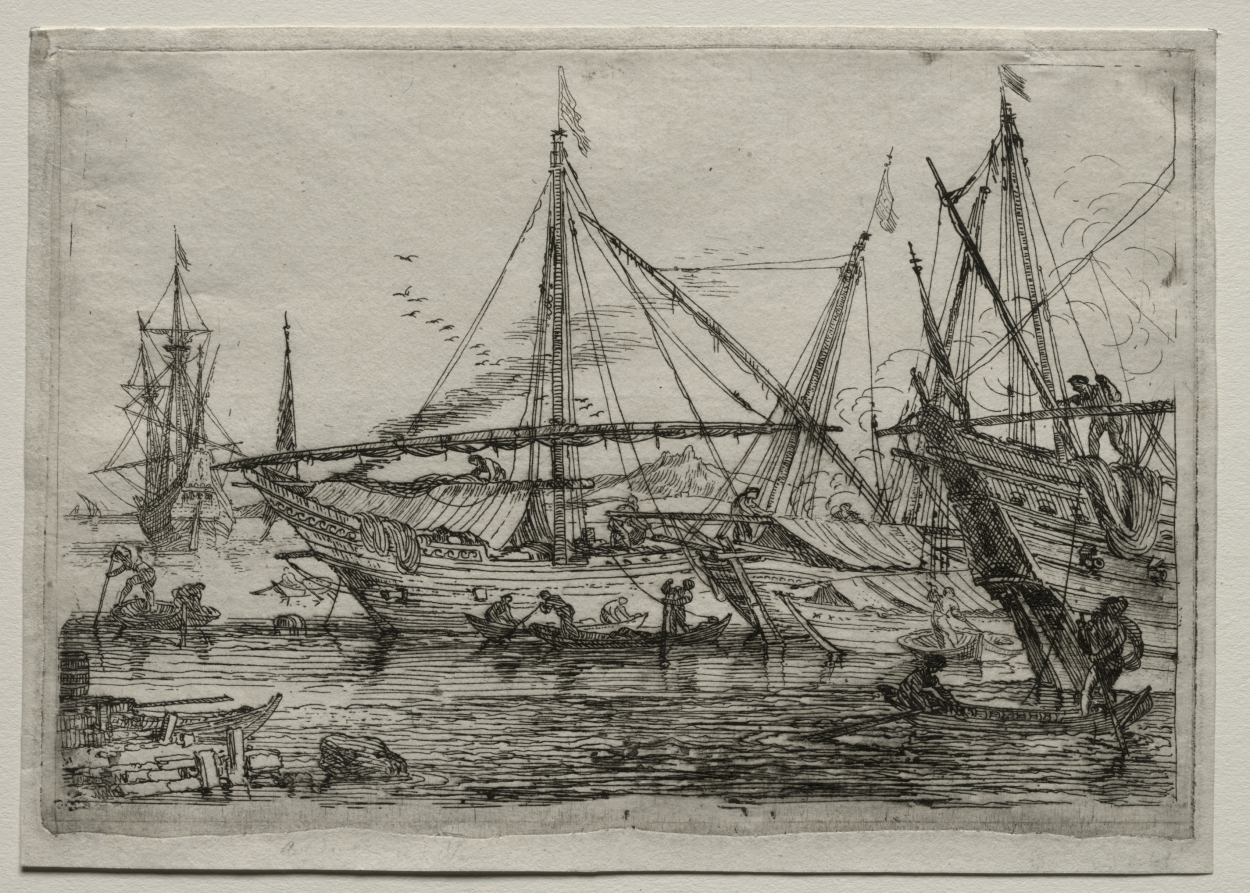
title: A Mediterranean Harbor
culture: Netherlands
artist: Adrian van der Cabel (Dutch, 1631–1705)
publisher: Nicolas Robert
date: 2nd half 1600s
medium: etching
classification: Print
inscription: VERSO, lower left, in graphite: B. 1871 ; lower center, in graphite: Van der Cabel ; lower center, in graphite: 6543 ; lower center, in graphite: B. 55 ; lower right, in graphite: 55 ; lower right, in graphite: FH